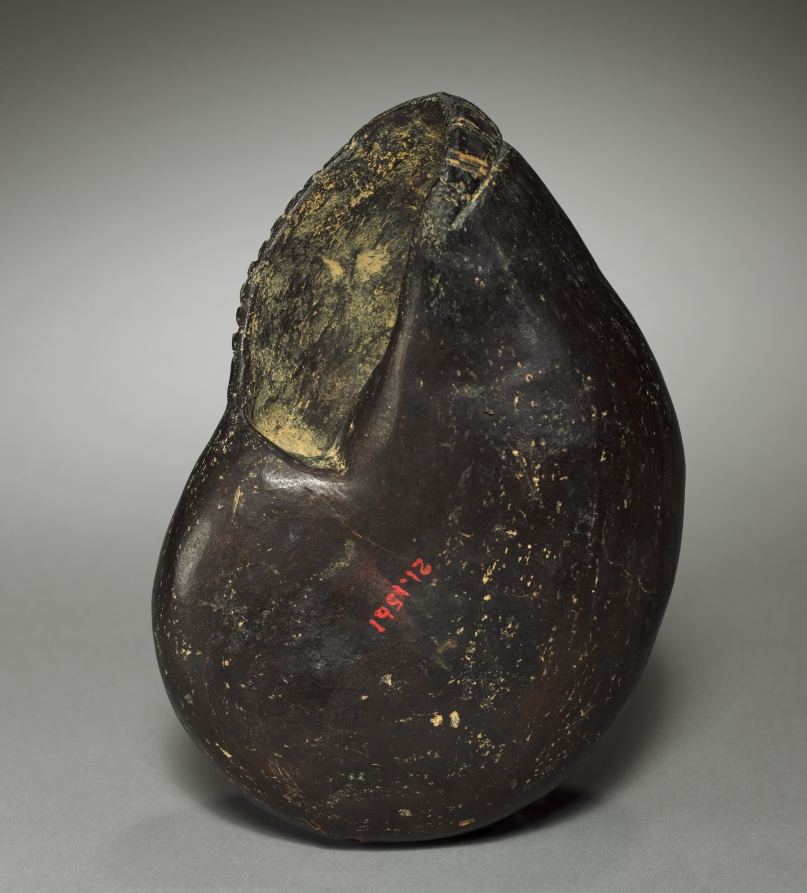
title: Large Snail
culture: Colombia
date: before 1921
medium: pottery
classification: Ceramic